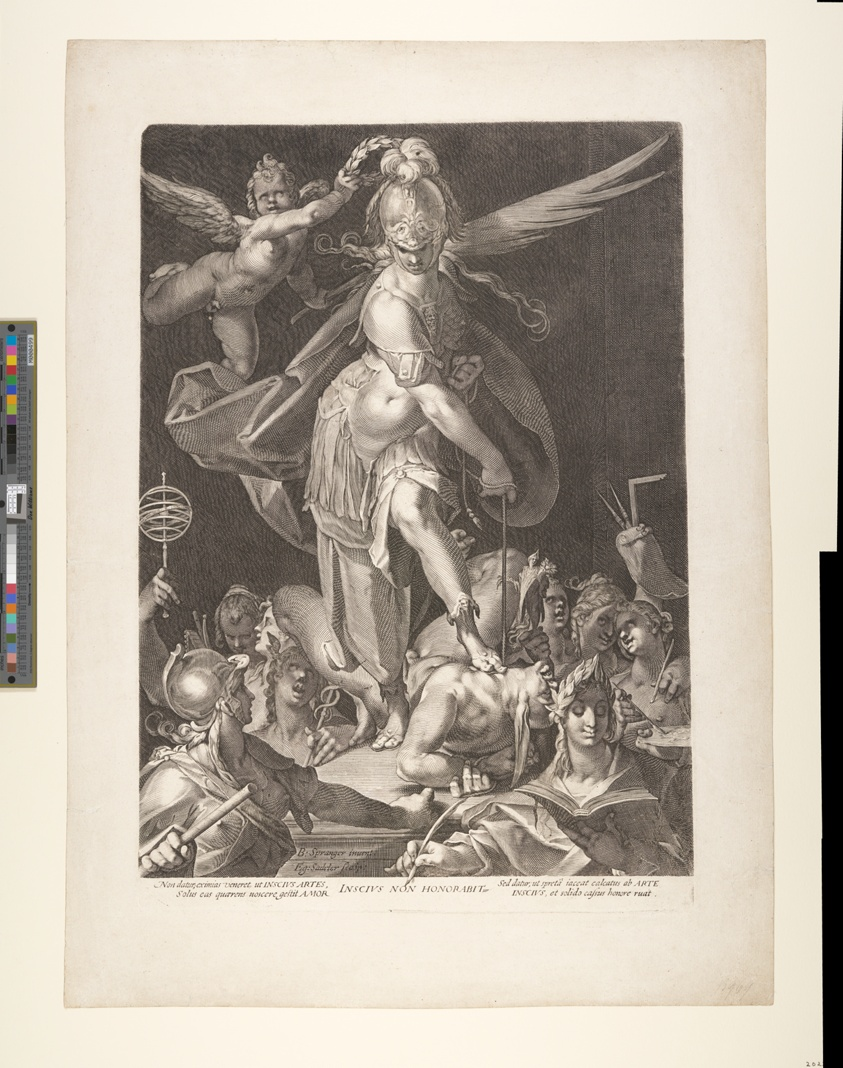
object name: Print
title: The Triumph of Wisdom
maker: Aegidius Sadeler II (Flemish, c. 1570–1629); after Bartholomeus Spranger (Flemish, 1546–1611)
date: c. 1600-10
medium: Engraving on ivory laid paper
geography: Flanders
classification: engraving; paper; print; prints and drawing